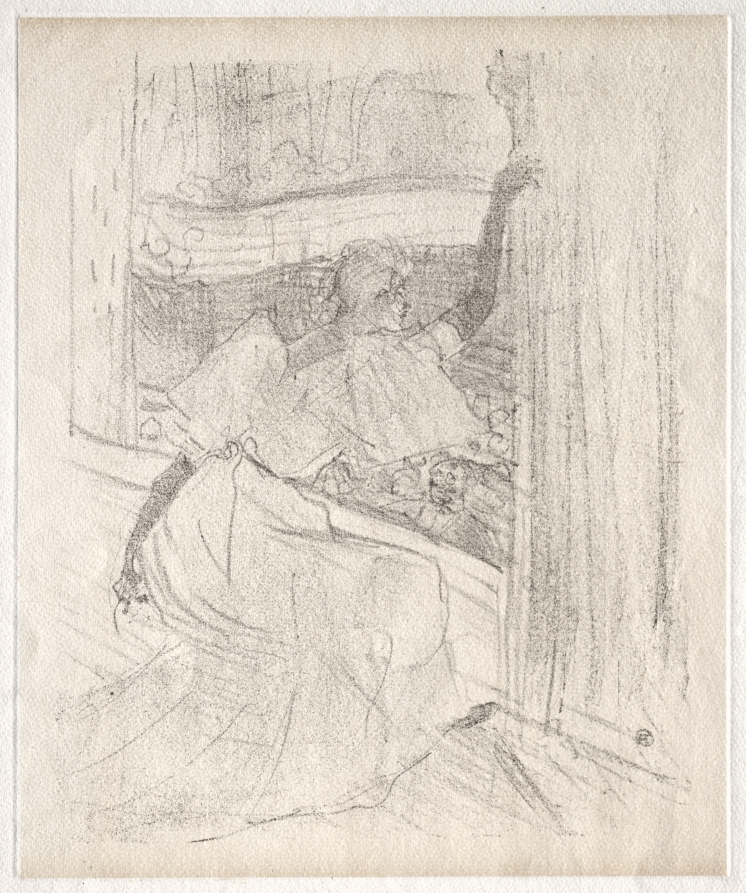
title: Yvette Guilbert: Saluant le public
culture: France, 19th century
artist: Henri de Toulouse-Lautrec (French, 1864–1901)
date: 1898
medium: lithograph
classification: Print